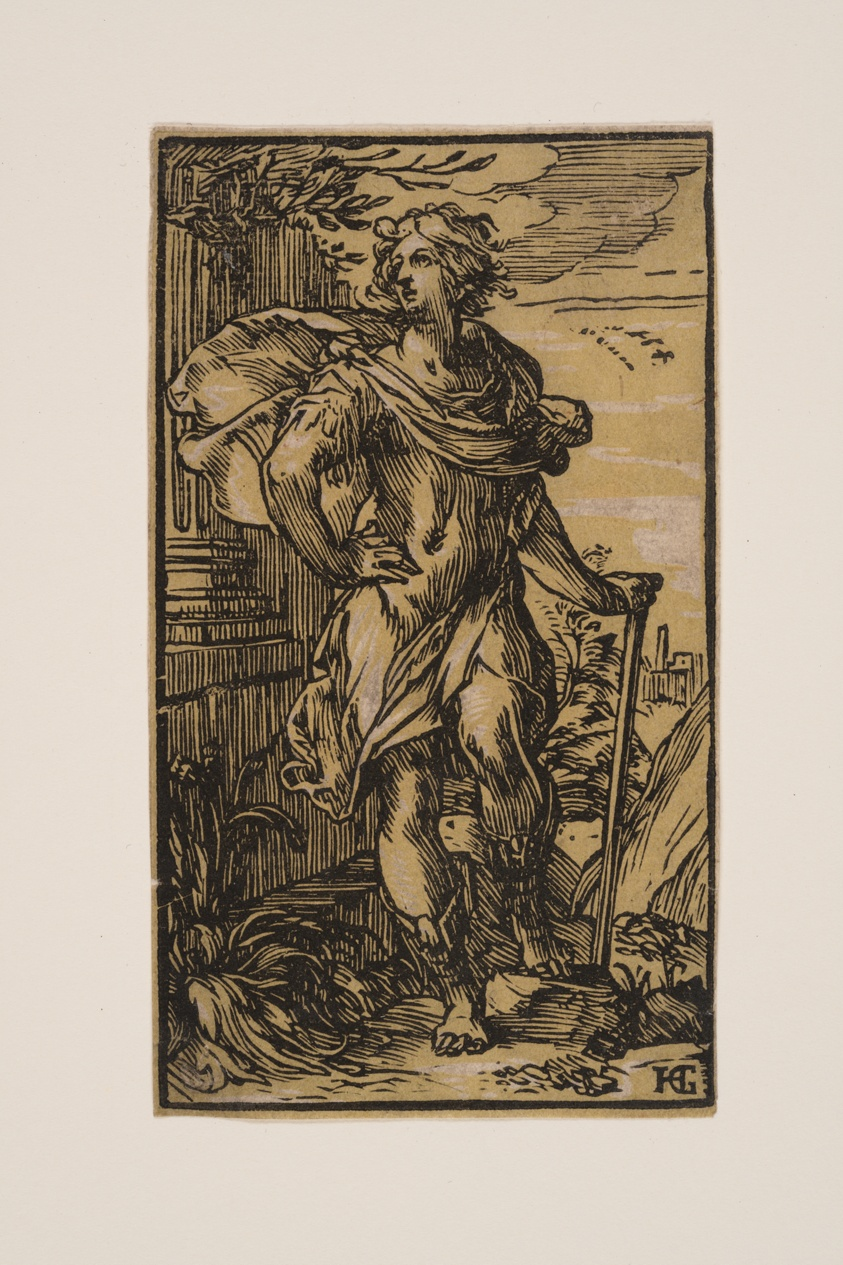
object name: Print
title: Standing Young Man with a Cane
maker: Hendrick Goltzius (Dutch, 1558–1617)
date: c. 1596-1600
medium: Chiaroscuro woodcut printed from two blocks in yellow on ivory laid paper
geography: Netherlands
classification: woodcut; paper; print; prints and drawing